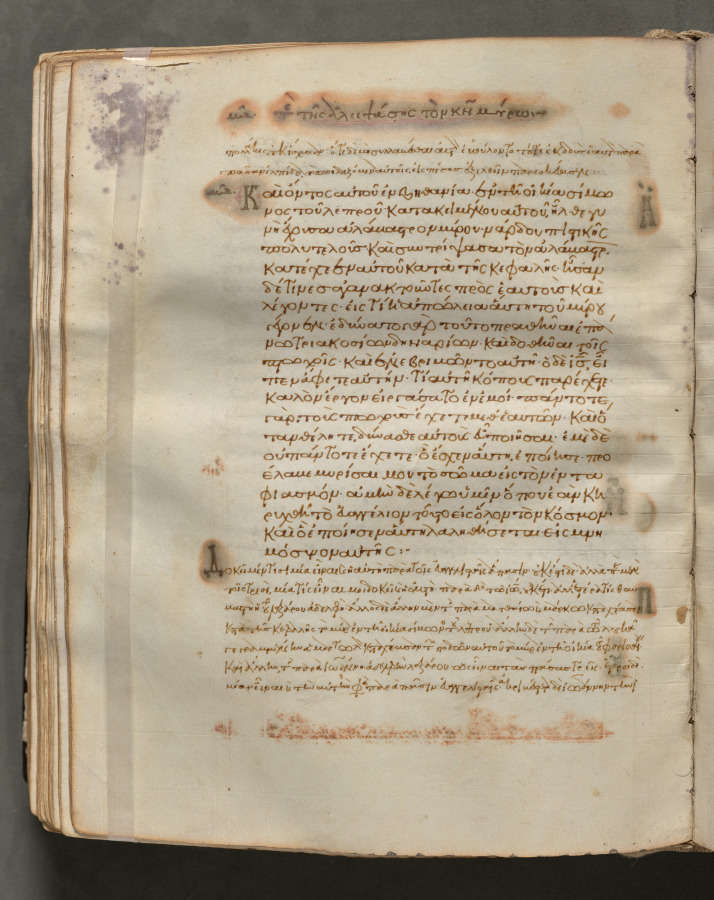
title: Text, folio 186 (verso), from a Gospel Book with Commentaries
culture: Byzantium, Constantinople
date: c. 1000–1100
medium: ink, tempera, and gold on vellum; leather binding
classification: Bound Volume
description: Each of the four gospels in this book opens on a page with brilliantly illuminated borders depicting the author of the text as well as birds-principally peacocks, symbols of the immortality of the soul-and fountains, representing the fountain of life and the salvation of the soul. This volume consists of 428 leaves with texts in Greek. Its level of sophistication suggests that it was probably written and decorated in a monastery in Constantinople.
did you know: Gospel Books were carried in procession through Byzantine churches.